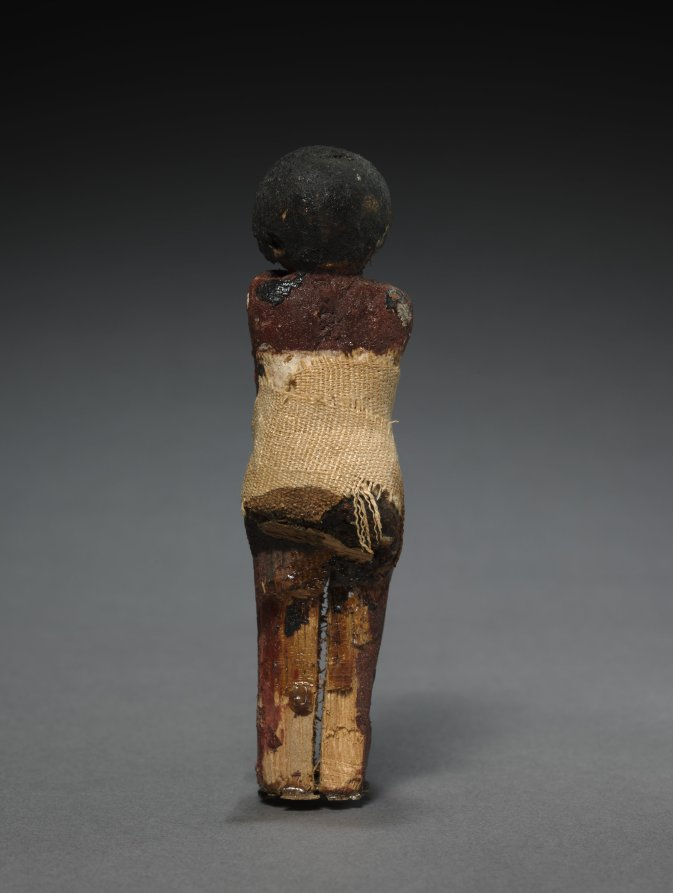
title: Seated Model Sailor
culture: Egypt, Middle Kingdom (2040–1648 BCE), Dynasties 11–12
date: c. 2000–1000 BCE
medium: painted sycamore fig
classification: Funerary Equipment